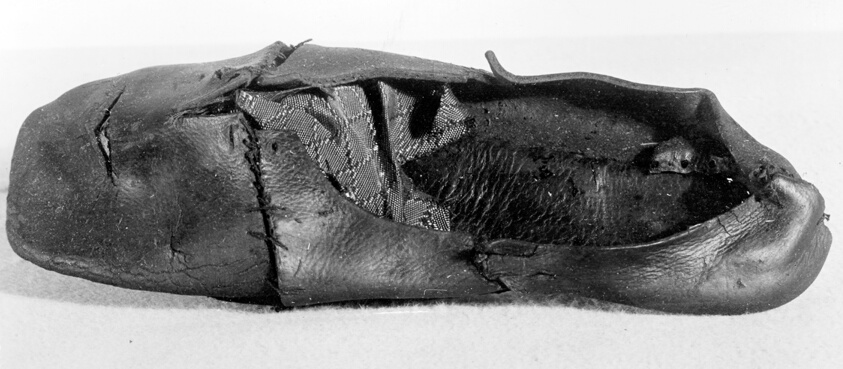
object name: Textile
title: Shoe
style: elizabethan, tudor, european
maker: England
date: 16th century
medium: Leather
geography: England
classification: textile; costume accessory - shoe; shoes - misc; costume; dress (garment); clothing